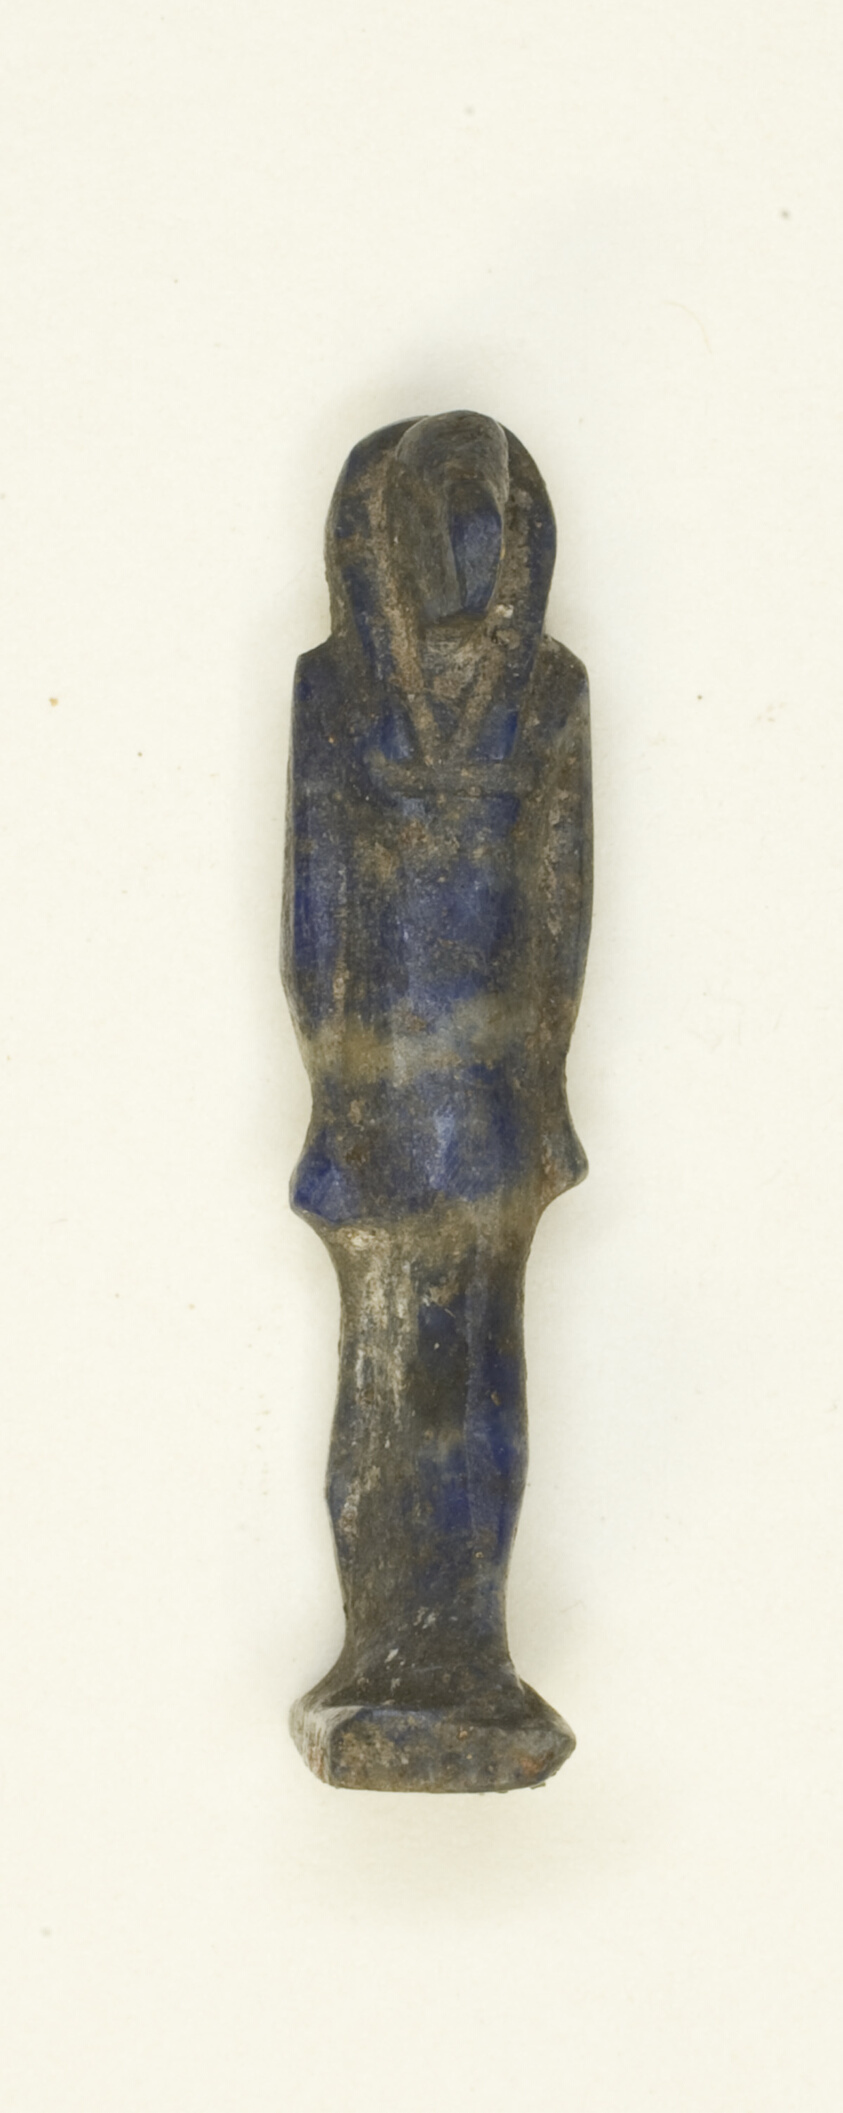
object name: Costume and Accessories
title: Amulet of the God Thoth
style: egyptian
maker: Egyptian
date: Late Period, Dynasties 26–31 (664–332 BCE)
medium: Lapis Lazuli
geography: Egypt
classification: amulet; jewelry; stone; ancient art; costume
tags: gods (deities)